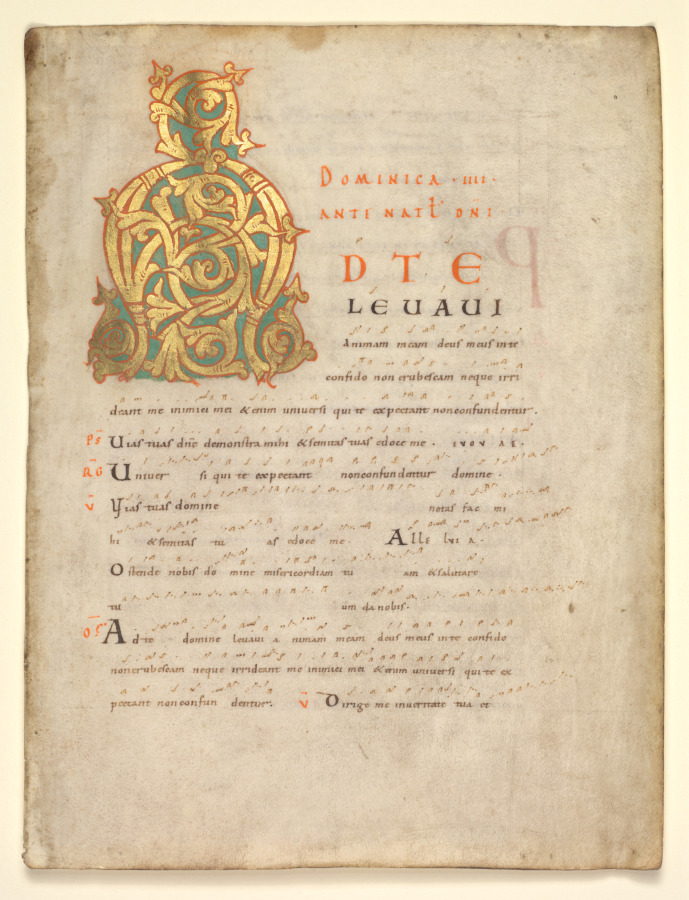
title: Single Leaf Excised from a Gradual and Sacramentary: Initial A[d te lavavi]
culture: Austria, Salzburg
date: c. 1000–1010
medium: ink, tempera, and gold on vellum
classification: Manuscript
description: A large initial A introduces the opening words from Psalm 25, Ad te levavi animam meam (Unto thee have I lifted up my soul). The volume to which this leaf belonged may have been produced in the scriptorium of the Benedictine Abbey of Saint Peter at Salzburg.